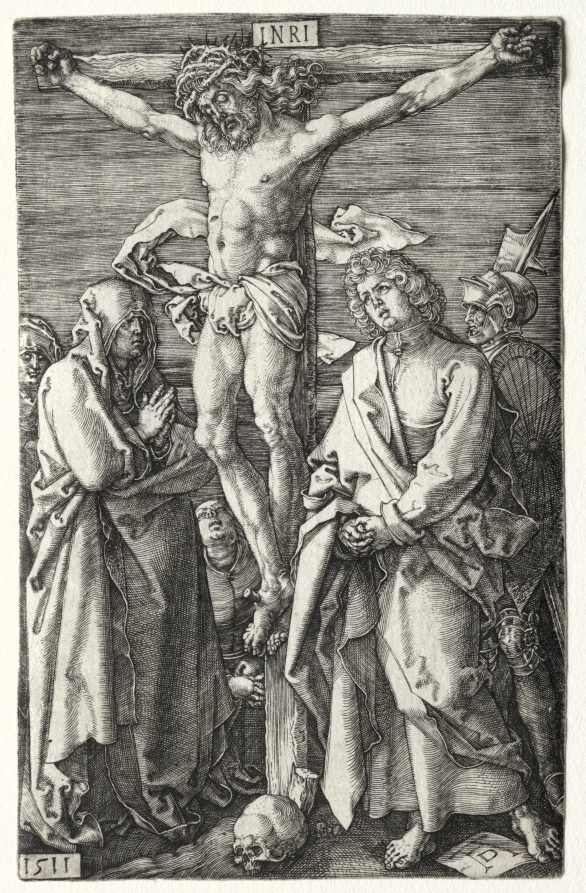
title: The Crucifixion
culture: Germany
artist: Albrecht Dürer (German, 1471–1528)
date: 1511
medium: engraving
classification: Print